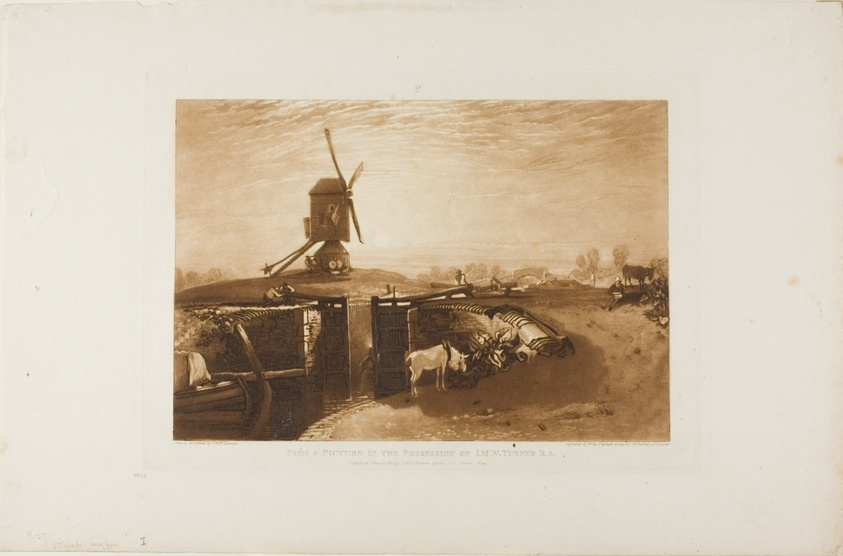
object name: Print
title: Windmill and Lock, plate 27 from Liber Studiorum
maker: Joseph Mallord William Turner (English, 1775-1851); Engraved by William Say (English, 1768-1834)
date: published June 1, 1811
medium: Etching and engraving in brown on ivory wove paper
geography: England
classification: etching; print; prints and drawing